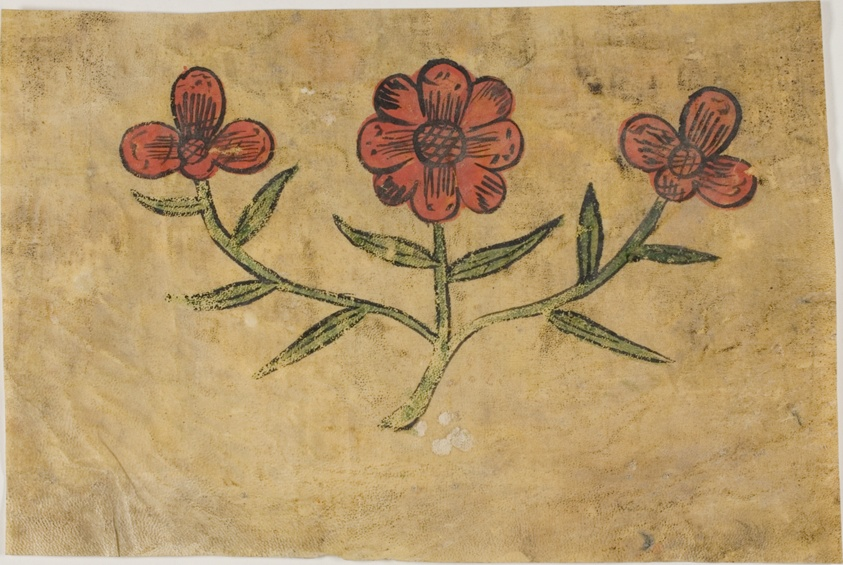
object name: Drawing and Watercolor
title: Manuscript Cutting with Flowers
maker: European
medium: Manuscript cutting in tempera and colored inks on vellum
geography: Europe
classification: tempera; drawings (visual works); prints and drawing